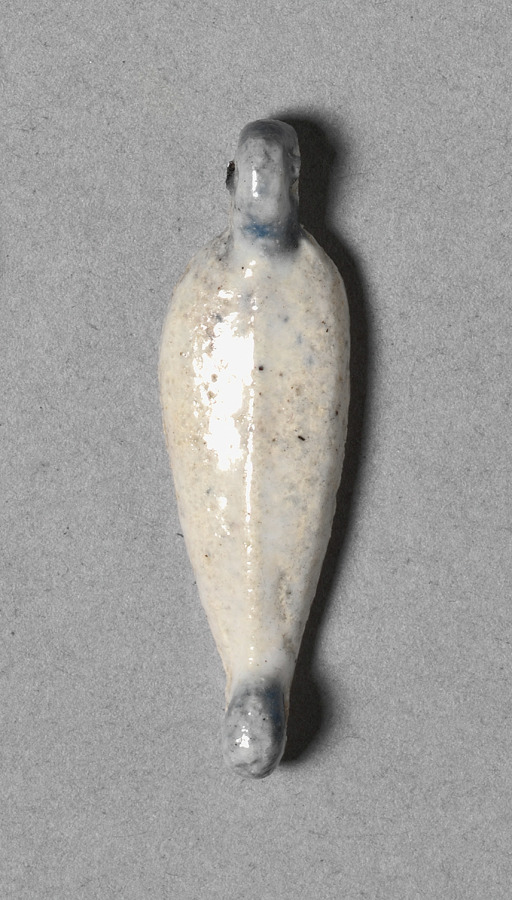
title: Petal-Shaped Bead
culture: Egypt, New Kingdom (1540–1069 BCE), Dynasty 18, reign of Amenhotep III (1390–1352 BCE)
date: c. 1391–1353 BCE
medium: faience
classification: Jewelry